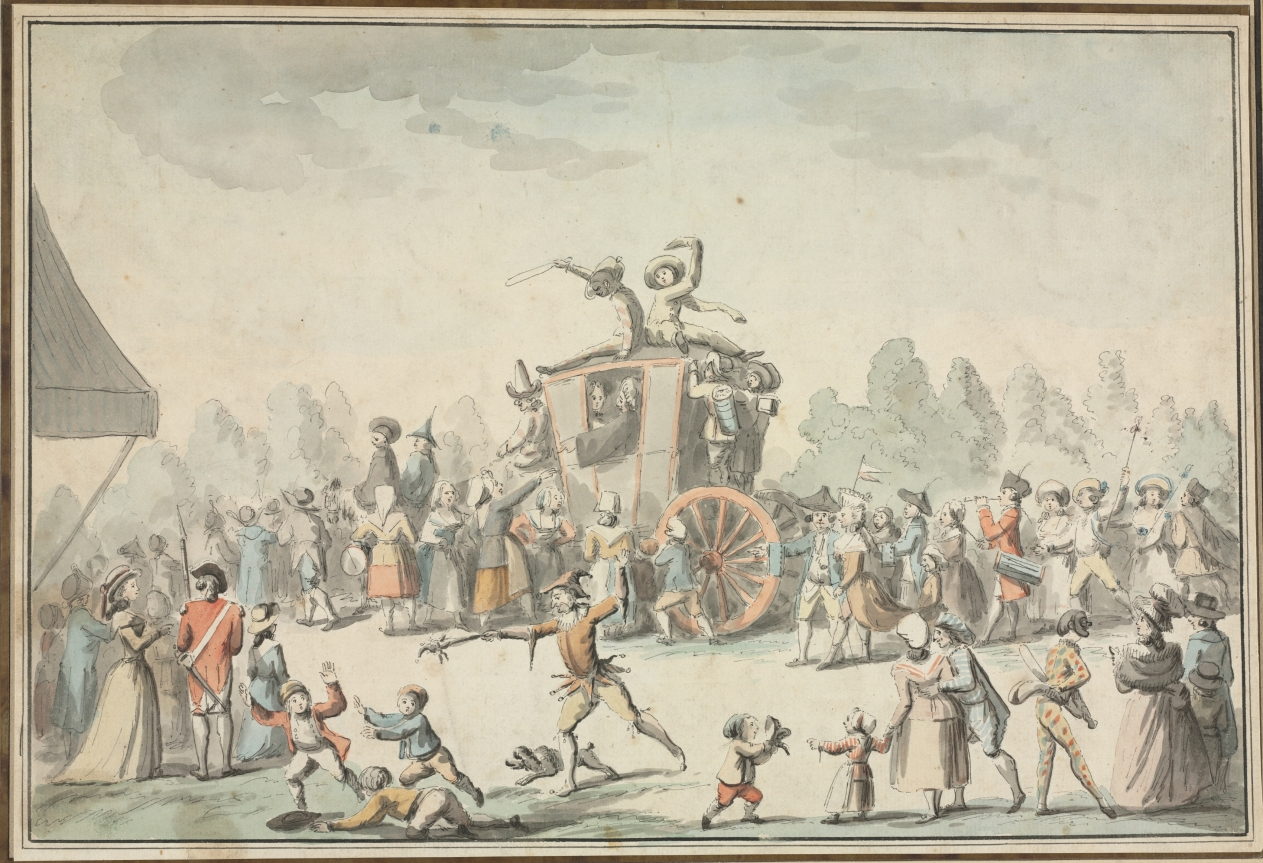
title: Scène de Carnaval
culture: France, 19th century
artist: Philibert Louis Debucourt (French, 1755–1832)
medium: pen and black ink and watercolor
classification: Drawing